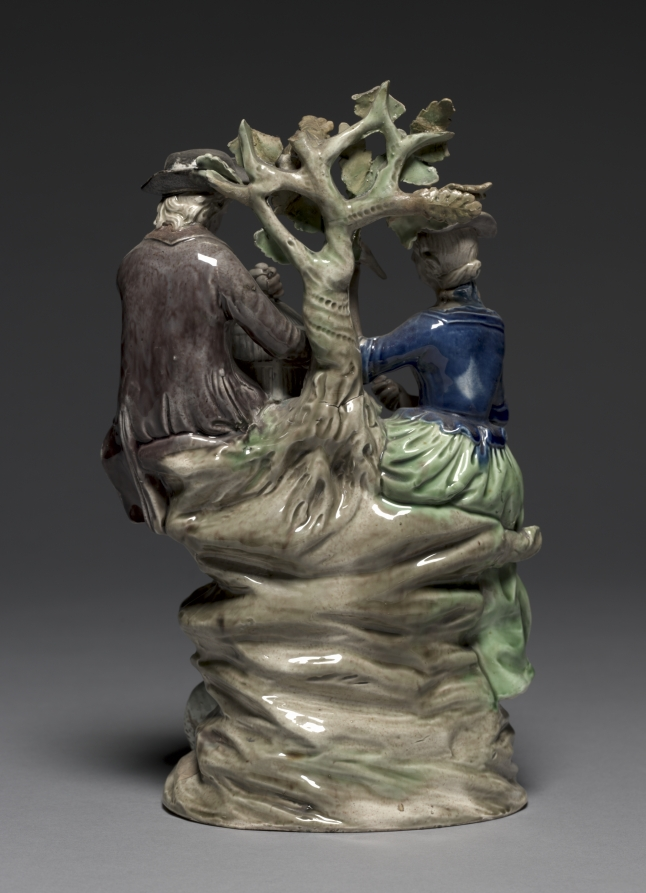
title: Group with Birdcage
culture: England, Staffordshire, 18th century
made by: Staffordshire Factory (British)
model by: John Voyez (French)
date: c. 1770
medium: lead glazed earthenware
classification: Ceramic